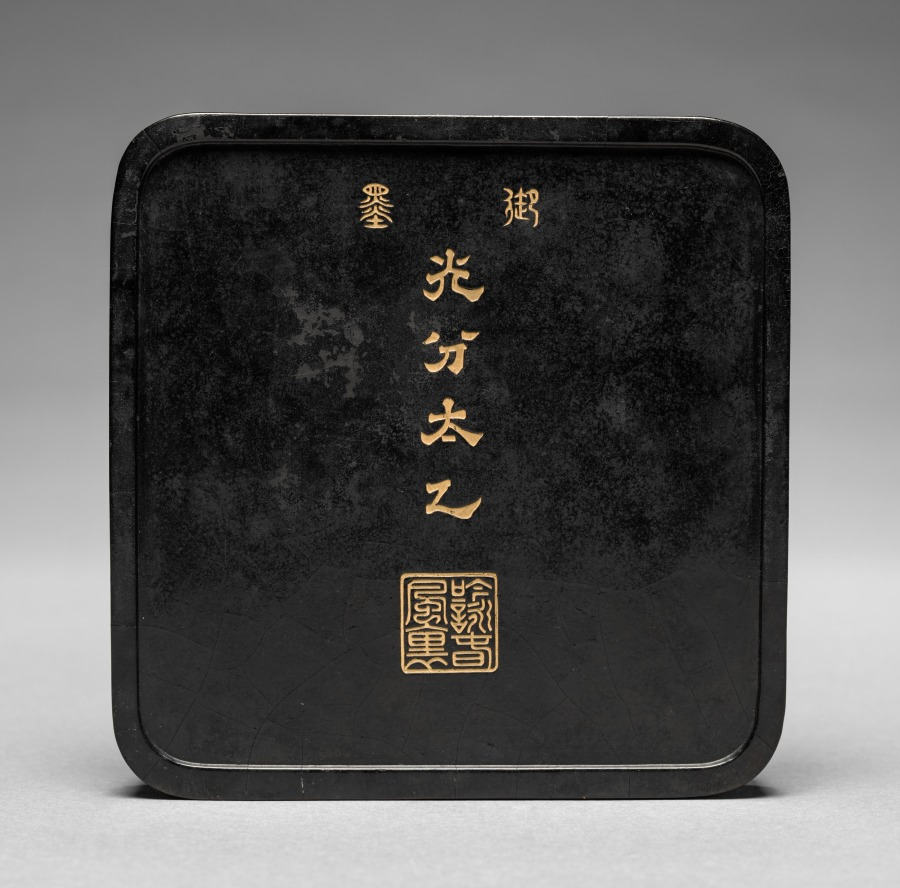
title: Ink Cake with Architectural Design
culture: China, Qing dynasty (1644-1911), Qianlong inscription, mark, and reign (1736-95)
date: 1736–95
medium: molded ink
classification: Miscellaneous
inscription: 大清乾隆年制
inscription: 待月樓珍藏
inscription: 御墨. 光分太乙. 吟詠春風里.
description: In China, access to political power was granted to those who passed the civil service examinations, a system that offered official service only at a high level of education. Chinese literati-officials, whose daily routine involved administrative work in an office, enjoyed precious objects on their writing desks that offered distraction and demonstrated good taste. By the Ming (1368–1644) and Qing (1644–1911) dynasties, these utensils of the literati studio also became collectibles and were treasured as artworks.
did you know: To make liquid ink, an ink cake is ground against an inkstone with a small quantity of water.